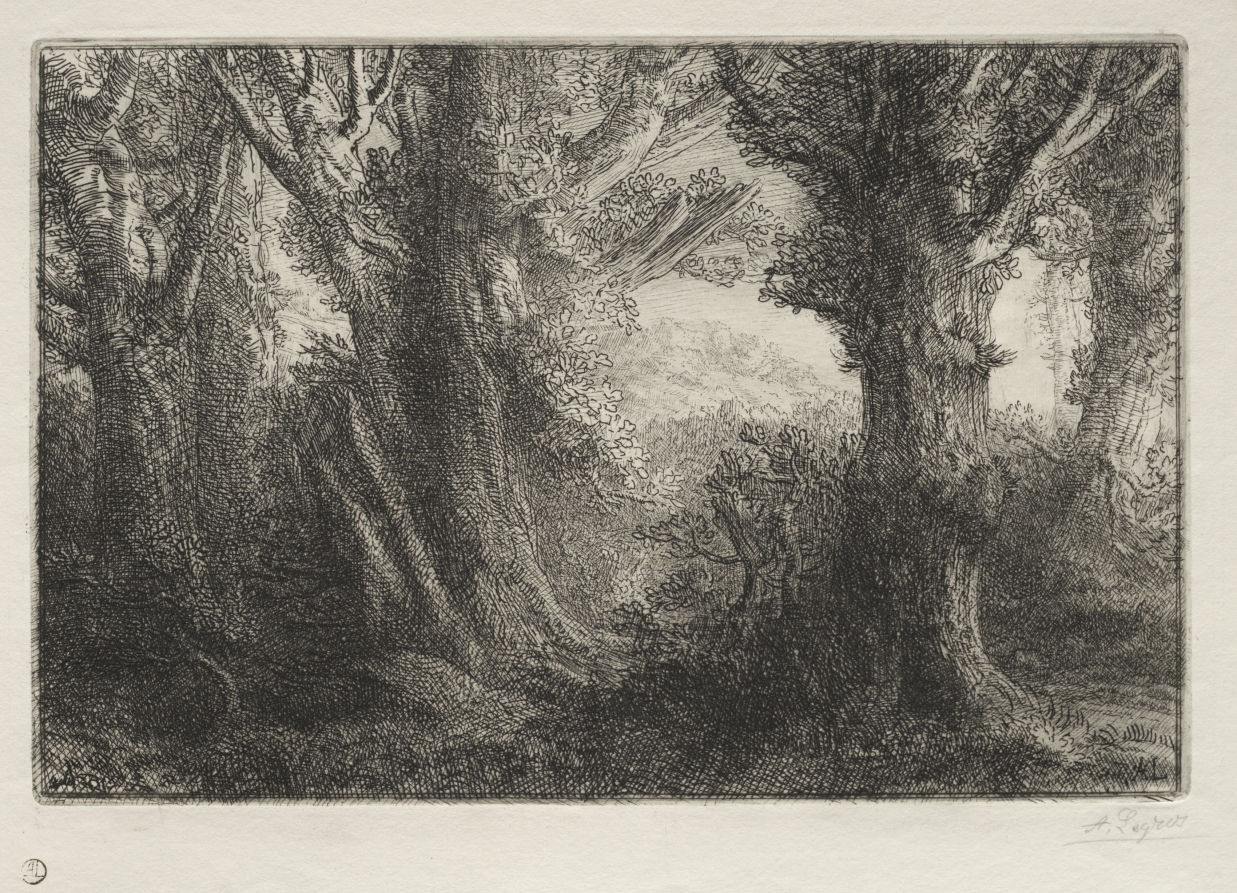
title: In the Forest at Conteville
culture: France, 19th-20th century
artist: Alphonse Legros (French, 1837–1911)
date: c. 1857–1911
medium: etching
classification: Print